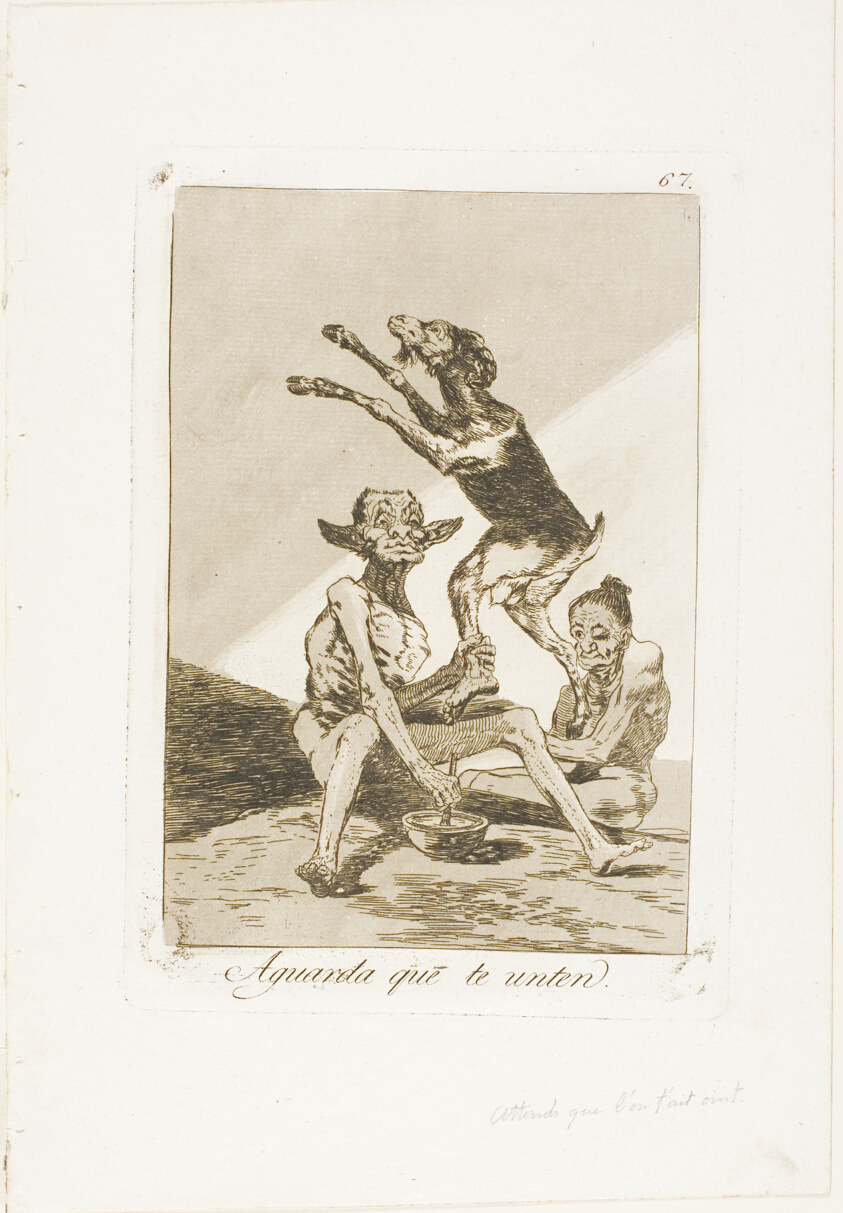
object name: Print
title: Wait till You've Been Anointed, plate 67 from Los Caprichos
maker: Francisco José de Goya y Lucientes (Spanish, 1746-1828)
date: 1797/99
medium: Etching and aquatint on ivory laid paper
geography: Spain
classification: etching; print; prints and drawing